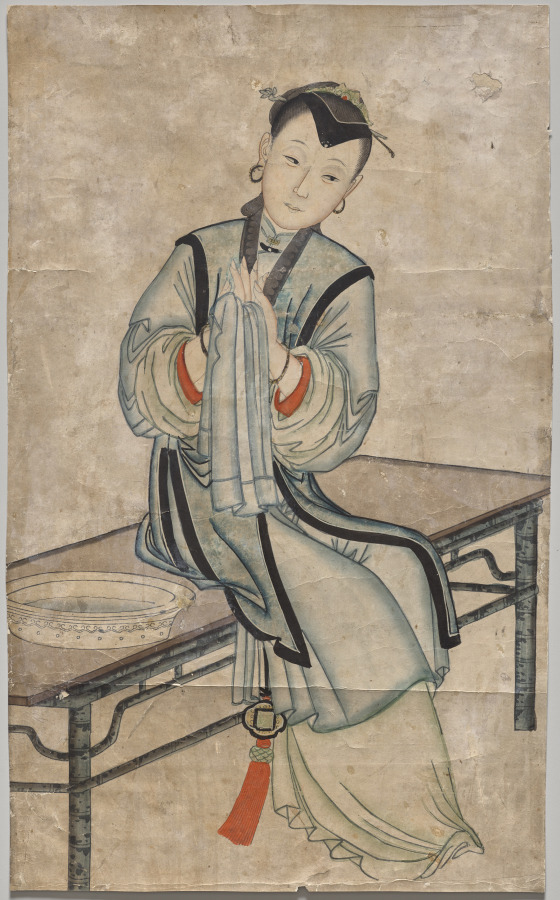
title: Two Beautiful Ladies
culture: China, Qing dynasty (1644–1911), Qianlong reign (1736–95)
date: 1736–95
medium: Polychrome woodblock print; ink and color on paper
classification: Print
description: In the 1600s, printing flourished in such Jiangnan cities as Nanjing, Suzhou, Hangzhou, and Huizhou, evolving from privately enjoyed illustrated books printed in color to more commercialized single-sheet color prints that were hung on walls and became part of the rich urban visual culture.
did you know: Woodblock printing in color reached a height in China in the 1600s to 1700s. The prints were executed by means of sets of separate blocks, each carved to print a different color.